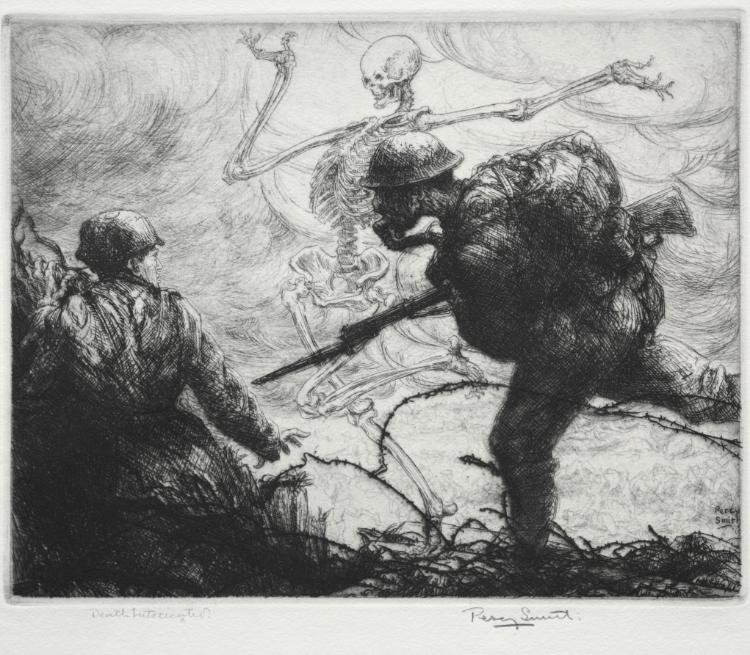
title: Dance of Death: Death Intoxicated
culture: England, 20th century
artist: Percy John Delf Smith (British, 1882–1948)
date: 1919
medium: etching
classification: Print